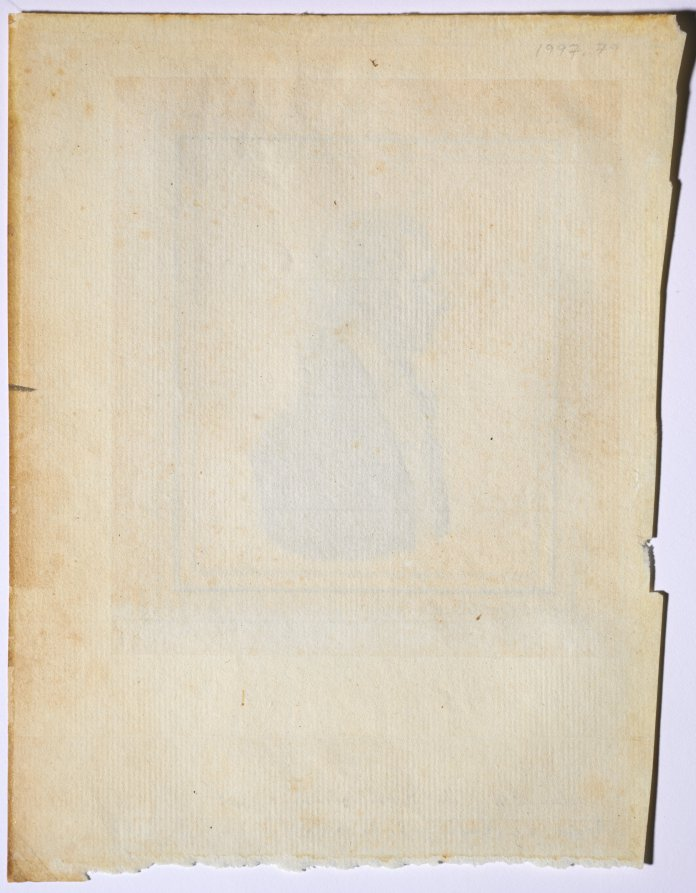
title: Portrait of Sir Captain West of the Dutton Indiaman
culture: England, 18th century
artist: John I Smart (British, 1741–1811)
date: 1785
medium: watercolor over traces of black chalk, with metallic gold paint on laid paper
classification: Portrait Miniature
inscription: by artist, across bottom, in brown ink: Captain West of the Dutton Indiaman 1785 / drawn on board going to Madras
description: Smart painted Captain West’s head in profile, turned to the right. His powdered hair is worn en queue with curls above his ears and white powder on his shoulders. He has long eyelashes, parted lips, and a grayish cast to his skin tone, particularly over his beard. West dons a blue coat with gold buttonholes embroidered in gold and a white waistcoat, high collar, and cravat tied in a small bow. This work is a finished drawing by Smart, evidenced in part by its larger size and by the fact that the painting of the sitter’s clothing is complete and the bust is placed within an elaborate border comprised of blue, metallic gold, and gray lines. This finished quality does not preclude the possibility that the drawing may also have functioned as a preparatory sketch for a miniature on ivory, which has not been located. Captain James West sailed the Dutton Indiaman from England to Madras, India, on several occasions, including Smart’s voyage in 1785. At least one of the sons of British judge Sir Elijah Impey was traveling with Smart on his journey to India and had his portrait taken by the artist. Another of Impey’s sons wrote of an earlier return passage to England made with Captain West in 1784, shedding light on the sea captain’s character and disposition. Impey’s account conveys not only West’s personality but the atmosphere that prevailed on the ship over which the captain presided and on which Smart traveled and worked. As indicated by an inscription in the artist’s hand, this portrait was painted by Smart while he was aboard the Dutton en route to Madras and probably retained by the artist as a memento. In addition to the portrait of “Master Impey,” Smart is known to have taken the likeness of other figures while aboard the Dutton, including the quartermaster “Baker” and a French ship called the Consalateur, which was intercepted by the Dutton while sailing to India. The current location of both works is unknown.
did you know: In 1784 it was written that "Captain James West, had the just reputation of being a first-rate mariner, a well-informed, and thoroughly practical man of business, and in every way worthy of confidential intimacy."